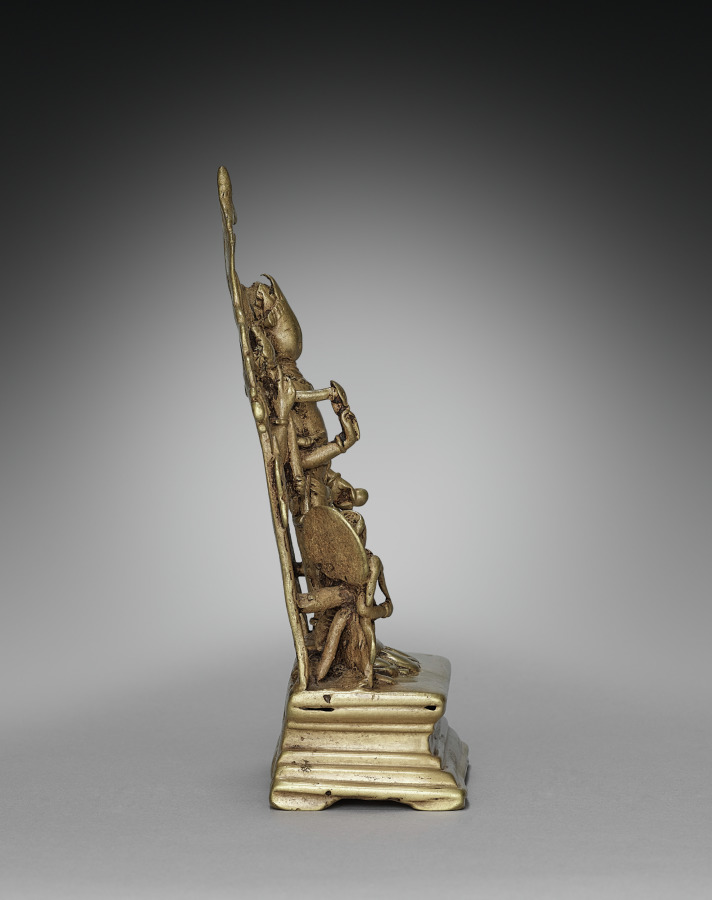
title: Standing Vishnu with Attendants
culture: India, Kashmir, 9th century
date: 800s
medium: brass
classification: Sculpture